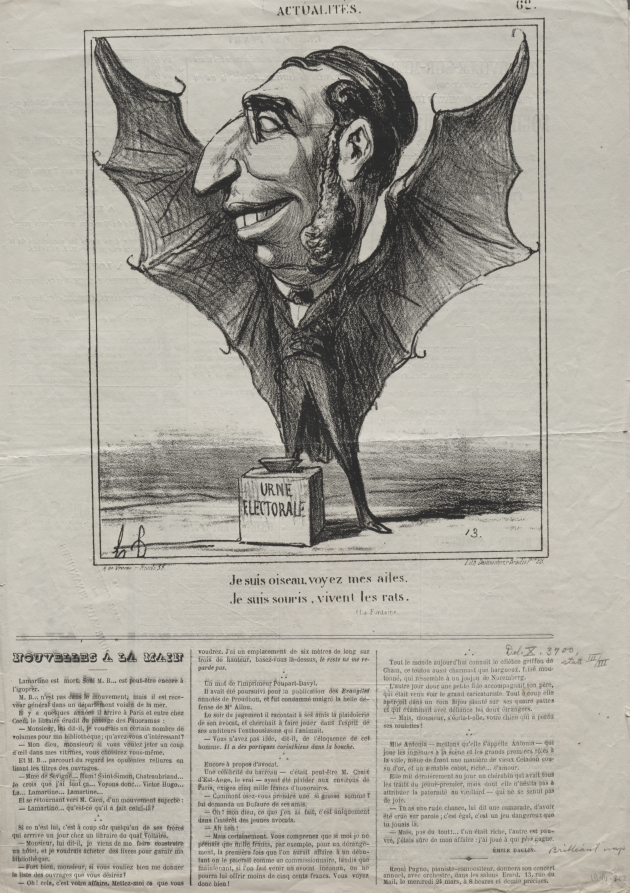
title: I am a bird, see my wings..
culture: France, 19th century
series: News of the Day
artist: Honoré Daumier (French, 1808–1879)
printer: Destouches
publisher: Arnaud de Vresse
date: 1869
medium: lithograph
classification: Print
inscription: Lower margin, printed: A de Vreese, r. Rivoli, 55./ Lith Destouches r. Paradis Pre. 28 ; Upper margin, pencil: 11 ; Bottom of page next to newsprint text, pencil: Del. X. 3700, / state III/III / Brilliant image(?) / 1946.202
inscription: Above image, printed: ACTUALITÉS. / 62 ; Below image, printed: Je suis oiseau, voyez me ailes, / Je suis souris, vivent les rat. / (La Fontaines)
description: This print was published in Le Charivari (March 24, 1869) as plate 62 from the series News of the Day.